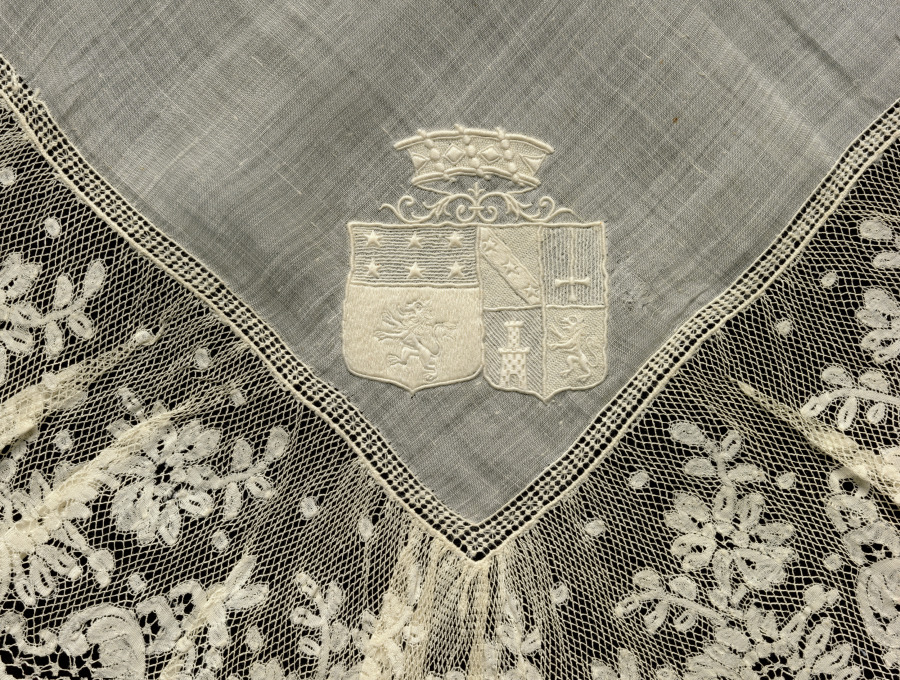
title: Lace Handkerchief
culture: France, Valenciennes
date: 1800s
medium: Plain weave linen center with bobbin lace (Valenciennes) edging and embroidery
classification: Lace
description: This handkerchief has a coat of arms embroidered in white in one corner.